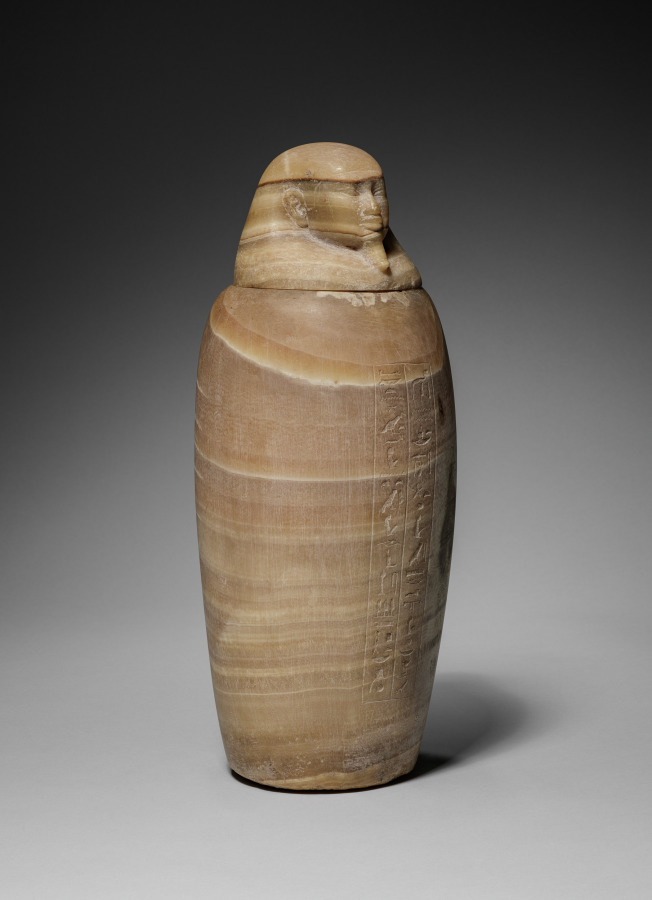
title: Canopic Jar with Man's Head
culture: Egypt, Late period (715–332 BCE), Dynasty 26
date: 664–525 BCE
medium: travertine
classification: Funerary Equipment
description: In the process of mummification, the liver, lungs, stomach, and intestines were removed, separately embalmed, and stored in specialized jars known as canopic jars (after a sailor in Greek mythology, who died at the town of Canopus in the Nile Delta and was worshipped there in the form of a human-headed jar). Each organ was identified with one of four funerary deities collectively known as the Sons of Horus: the liver with Imsety (man's head), the lungs with Hapy (baboon's head), the stomach with Duamutef (jackal's head), and the intestines with Qebehsenuef (falcon's head). It was their duty to protect the deceased and restore to him his body parts in the hereafter.